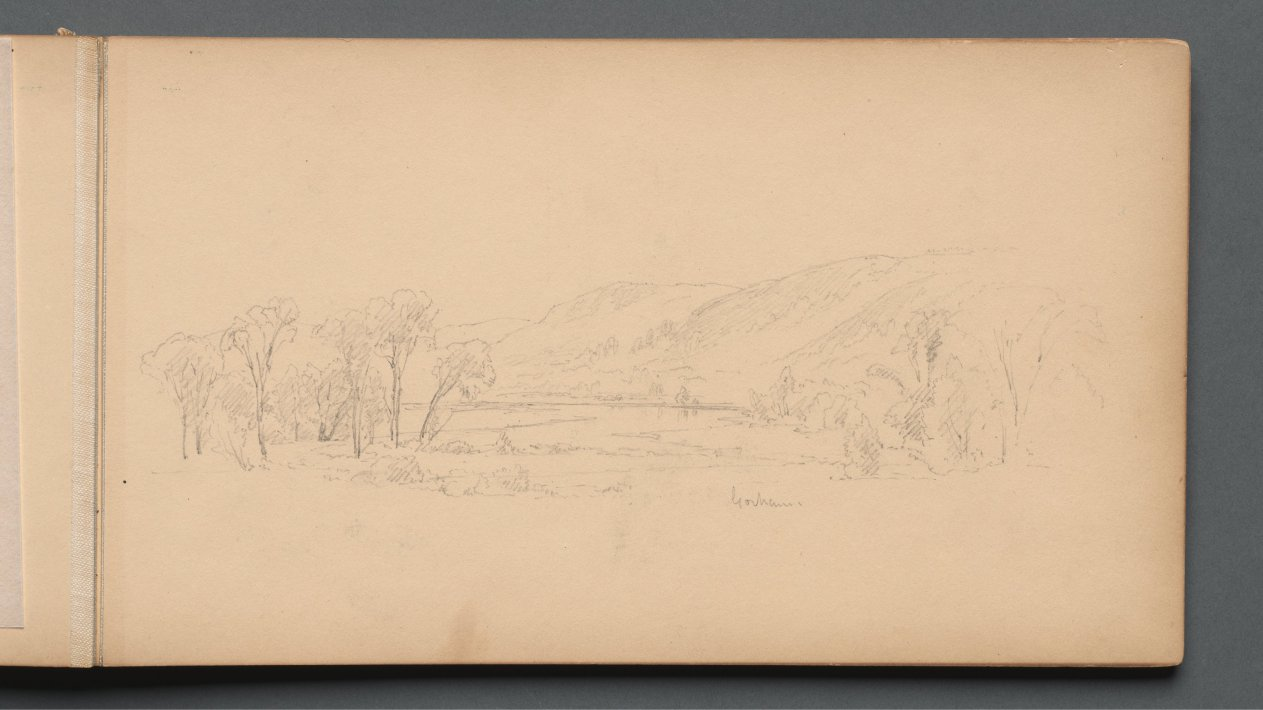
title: Sketchbook, page 06: "Gorham" (Maine)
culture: America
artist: Sanford Robinson Gifford (American, 1823–1880)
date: 1859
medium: graphite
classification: Bound Volume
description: Gifford was an American landscape painter belonging to the second generation of Hudson River school artists. Based in New York City with a studio at the Tenth Street Studio Building, Gifford took annual summer trips to the Catskills, the Adirondacks, and other scenic locations in New England. This sketchbook accompanied the artist on his expedition in 1859 to New Hampshire and Maine, where he drew sites such as Dixville Notch, the White Mountains, and Peaks Island, Casco Bay. Gifford used such graphite studies as the basis for oil paintings worked up in his studio, such as A Home in the Wilderness (1866).